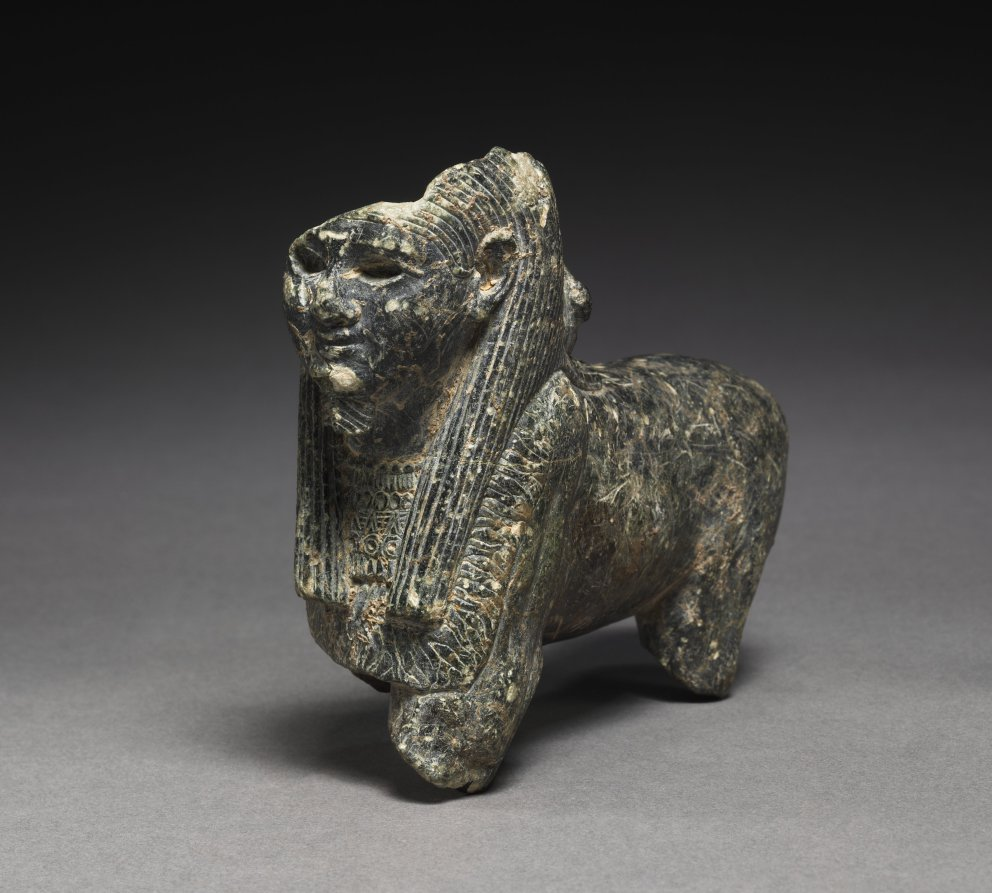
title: Tutu as Sphinx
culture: Egypt, Greco-Roman period (332 BCE–395 CE), Ptolemaic dynasty (305–30 BCE)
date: 150 BCE–30 CE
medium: gray steatite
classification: Sculpture